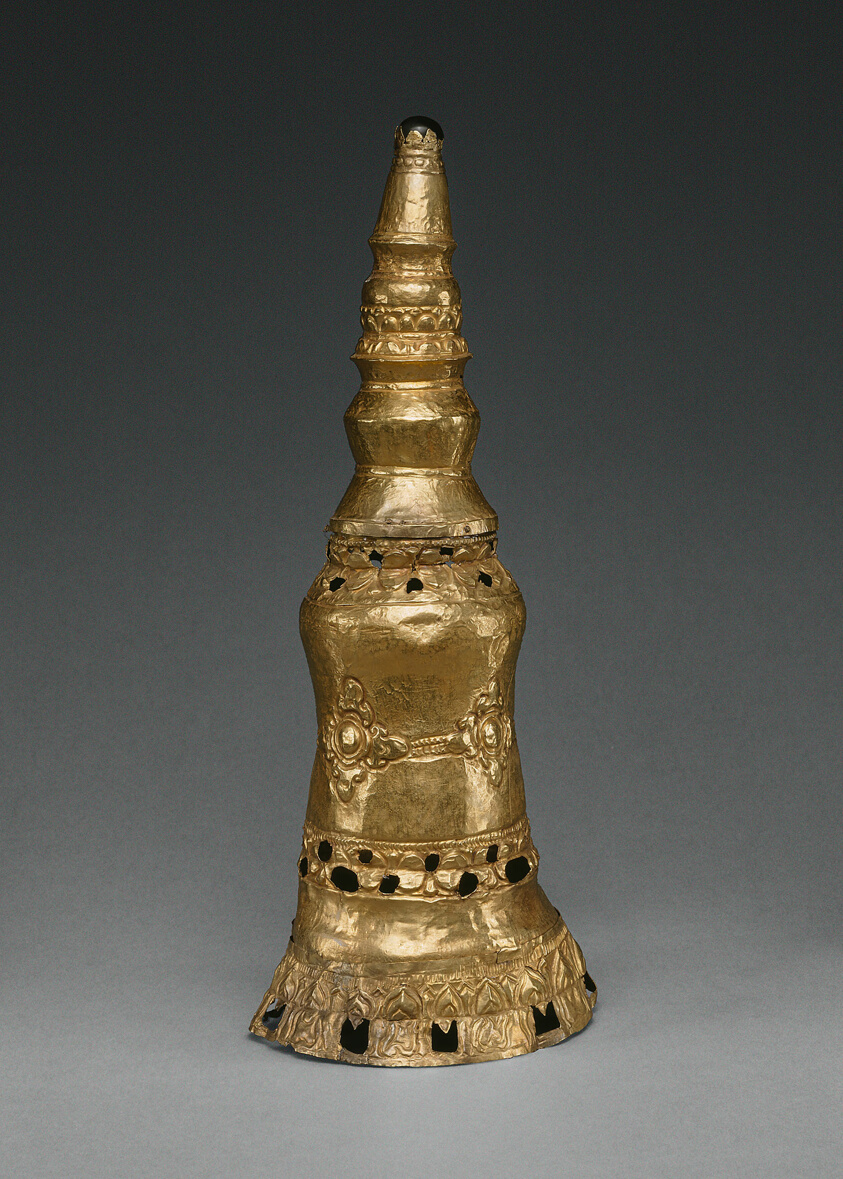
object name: Sculpture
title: Stupa Reliquary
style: Southeast Asian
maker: Burma (Myanmar) or Thailand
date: 9th/10th century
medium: Gold repoussé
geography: Myanmar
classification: reliquary; container; gold; metal; sculpture; asian art